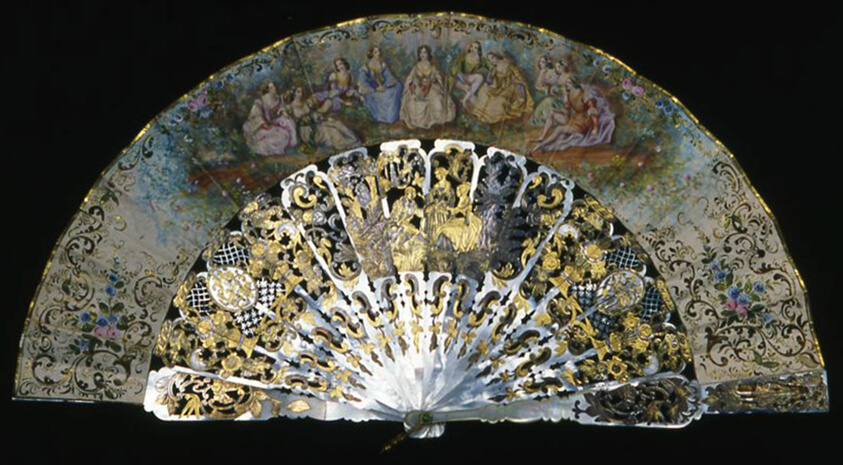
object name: Costume and Accessories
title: Fan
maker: France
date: 1825/75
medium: Ivory guards and sticks, carved and etched; gold and silver leaf; paper mount, painted; gold leaf; pin and metal with imitation gemstones; handle of metal; gilt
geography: France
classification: textile; fan - paper; costume accessory - folding fan; costume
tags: fashion